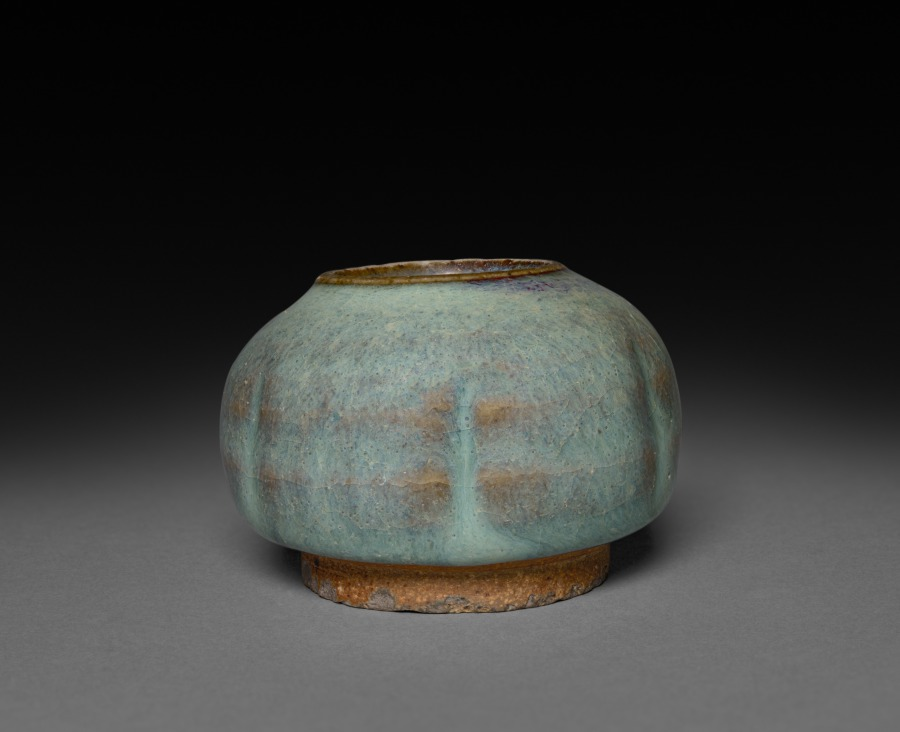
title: Small Lobed Jar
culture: Northern China, Jin dynasty (1115-1234) - Yuan dynasty (1271-1368)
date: 1115–1368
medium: glazed buff stoneware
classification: Ceramic